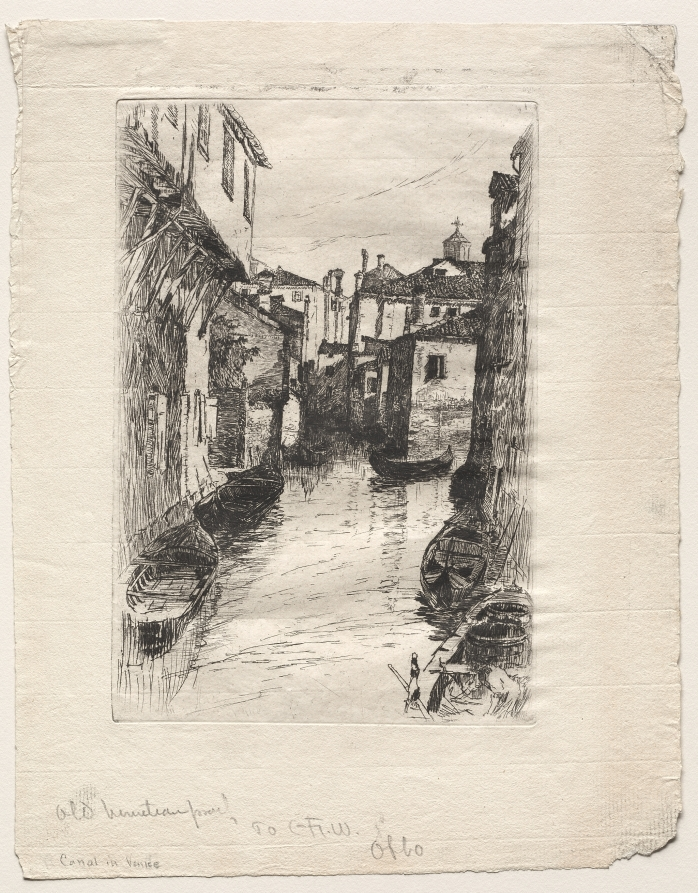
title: Canal in Venice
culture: America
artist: Otto H. Bacher (American, 1856–1909)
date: 1880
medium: etching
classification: Print